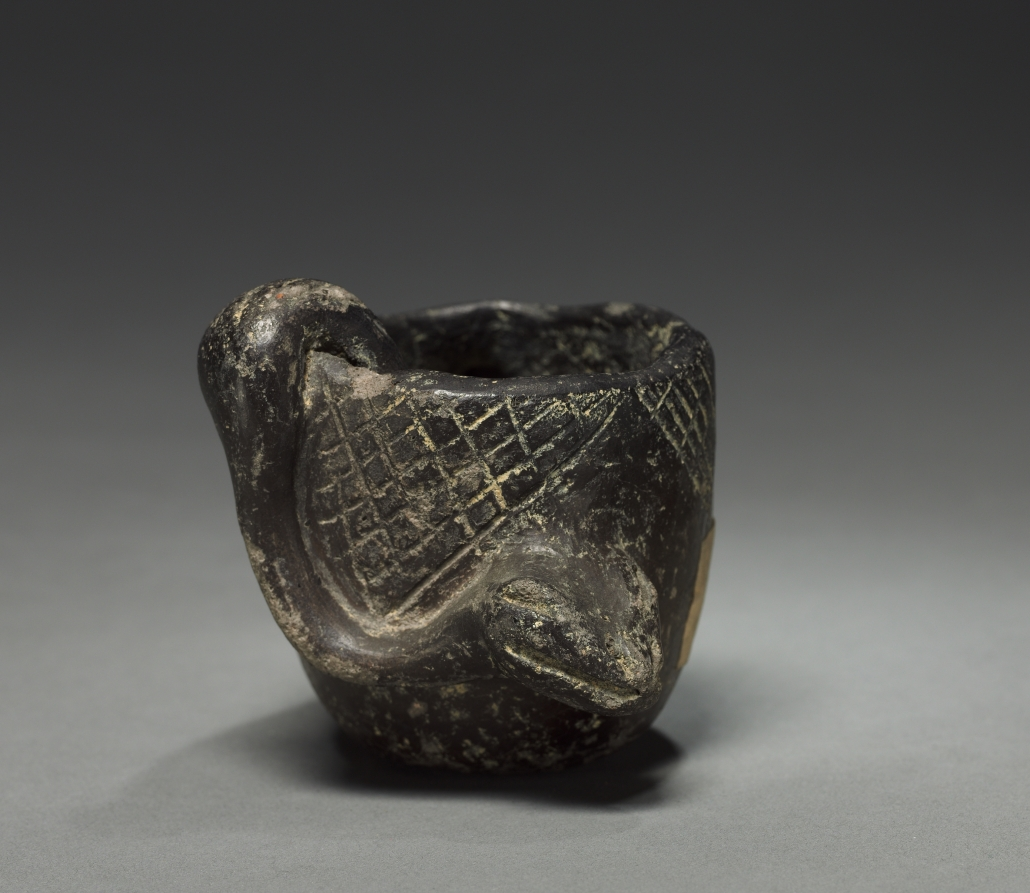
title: Dish with Handle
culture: Colombia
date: before 1921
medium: pottery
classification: Ceramic